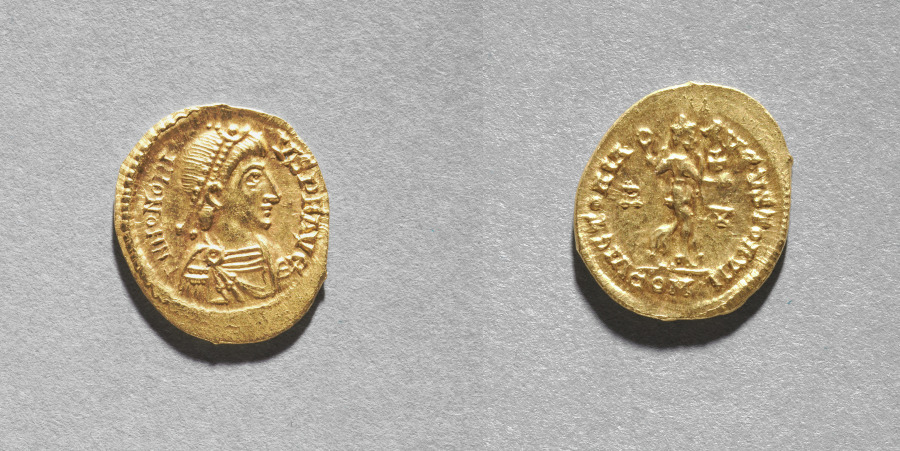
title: Solidus of Arkadios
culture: Byzantium, Constantinople, Byzantine period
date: 395–408 CE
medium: gold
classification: Coins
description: The vast number of surviving Byzantine coins attests to the level of trade across the empire. Controlled and supervised by the emperor, the producers of coins took care to represent his authority and reflect his stature. Talented artists were recruited to engrave the dies (molds) used for the striking of coins. Emperors increasingly came to include their heirs and co-emperors on their coinage, as well as other family members or even earlier rulers. Coins were recognized, then as now, as small, portable works of art. With their inscriptions and images, Byzantine coins provide valuable documentation of historical events and a record of the physical appearance of the emperors. The coins shown here include the solidus, the basic gold coin of 24 karats; the tremissis, a gold coin of one-third the weight and value of the solidus; and the nomisma, which in the 10th century replaced the solidus as the standard gold coin.